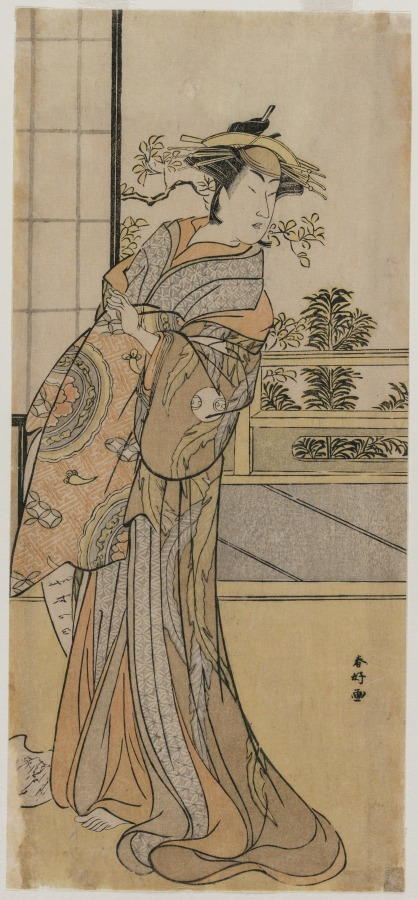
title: Arashi Murajiro as a Courtesan Holding a Letter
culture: Japan, Edo period (1615–1868)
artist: Katsukawa Shunkō (Japanese, 1743–1812)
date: late 1780s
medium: color woodblock print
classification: Print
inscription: Signature: Shunko ga